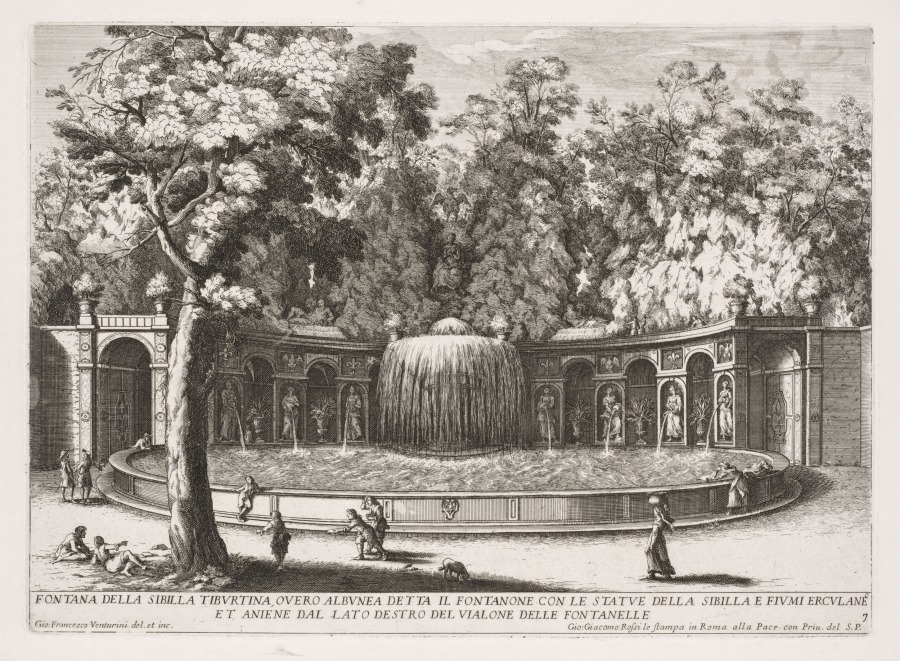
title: The Fountains of Rome (Le fontane di Roma), Book IV, plate 7: Fountain of the Tiburtine Sibyl (Fontana della Sibilla Tiburtina)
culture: Italy, 17th century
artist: Giovanni Francesco Venturini (Italian, 1650–1710)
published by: Stamperia Giovanni Giacomo de Rossi (Italian, 1600–1750)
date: 1676–1700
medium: etching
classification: Print